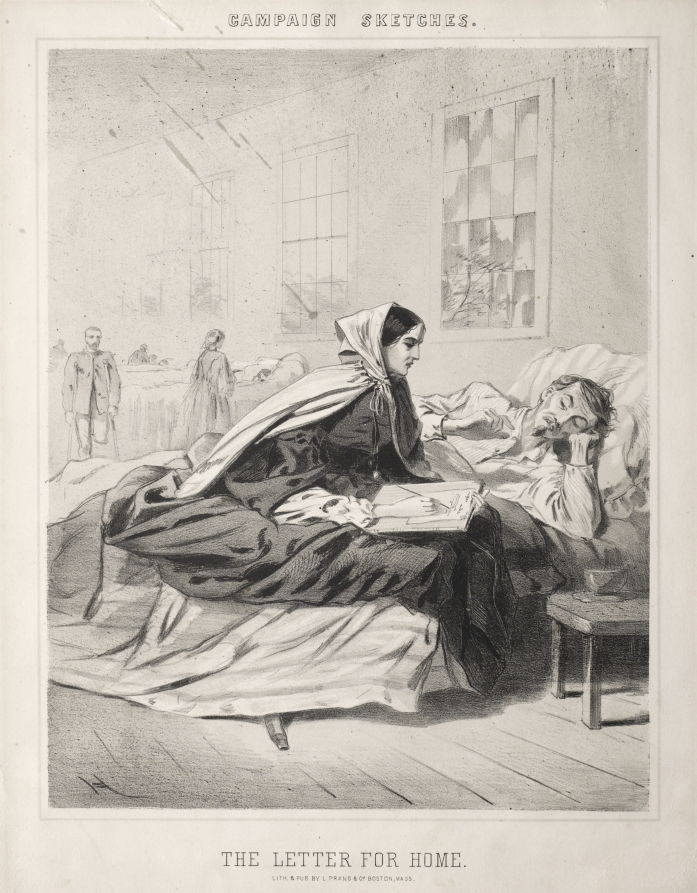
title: Campaign Sketches: The Letter for Home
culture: America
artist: Winslow Homer (American, 1836–1910)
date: 1863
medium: lithograph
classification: Print